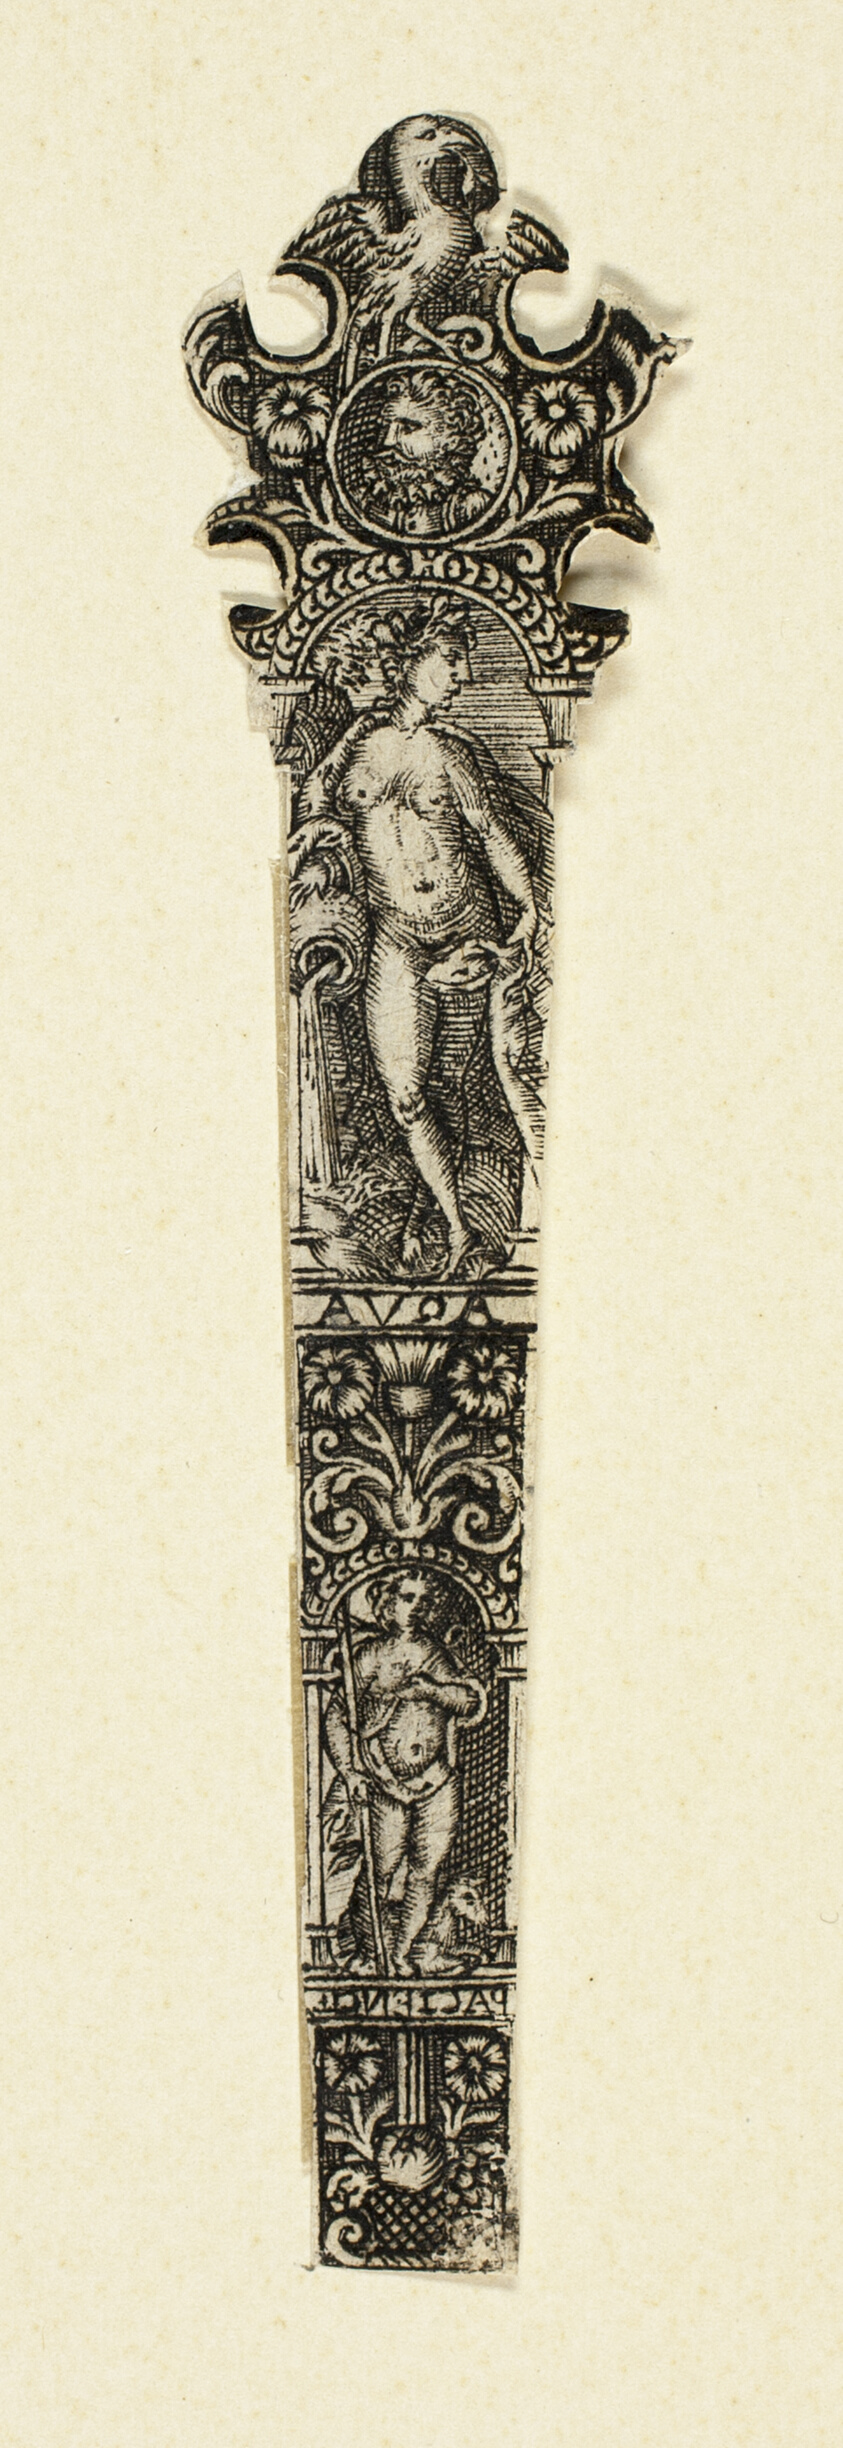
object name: Print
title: Ornamental Design for Knife Handle with Water, from The Four Elements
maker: After Johann Theodor de Bry; German, 1561-1623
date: c. 1590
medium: Engraving in black on ivory laid paper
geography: Flanders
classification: engraving; paper; print; prints and drawing